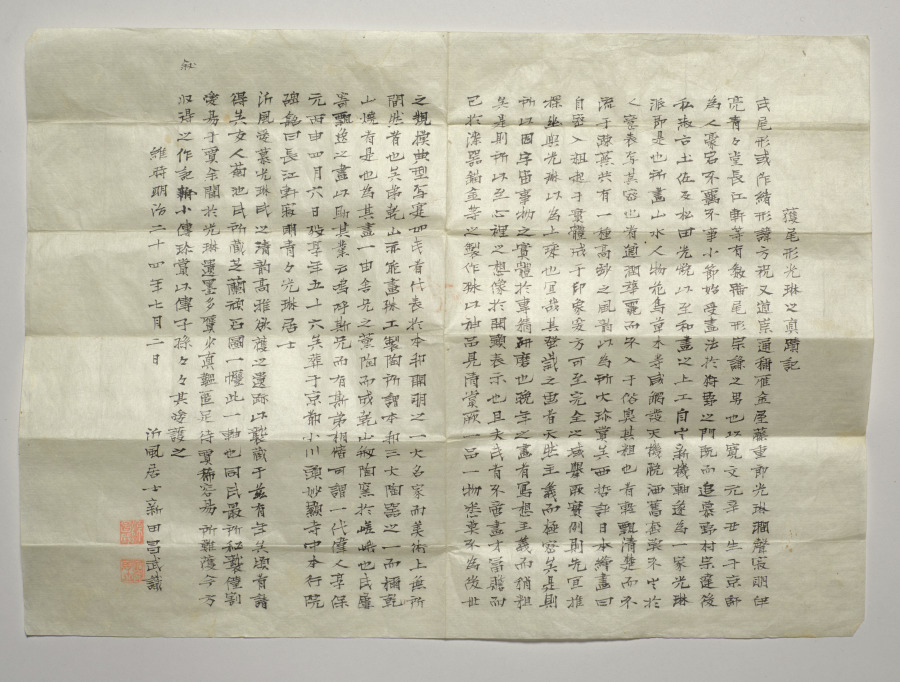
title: Plum Tree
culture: Japan, Edo period (1615–1868)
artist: Ogata Kōrin (Japanese, 1658–1716)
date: c. 1700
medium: hanging scroll; ink on silk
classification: Painting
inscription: Artist's signature and seal above hillock bottom right corner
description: Ogata Kōrin had to think through his design carefully to create these white plum blossoms and deliver their effect, as he used the reserve technique—where selected areas of the painting surface are left unpainted—to achieve it. He probably roughed in the tree before applying an ink wash to the entire silk surface, except where he intended to place the flowers. He likely then returned to articulate the petals and, in some cases, the pistils and stamens. The composition shows the tree twisting out of view, only to return with a branch of new growth jabbing forth from an old, broken limb, thereby heightening the visual impact of the blossoms.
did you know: The Rinpa style of painting is named for Ogata Kōrin, even though he did not create it.